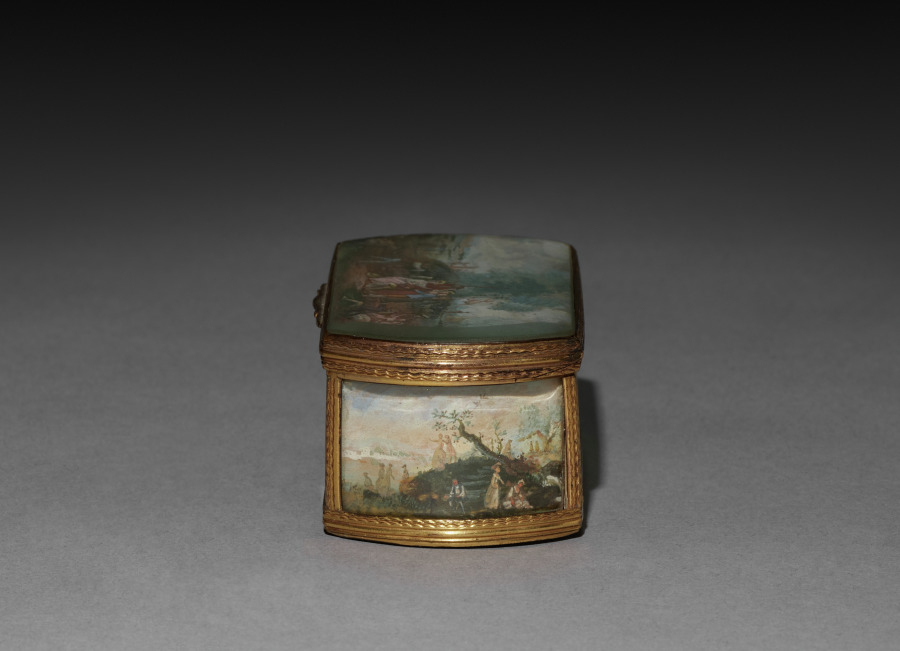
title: Snuff Box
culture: France, 19th century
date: 1800s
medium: gilt metal box with painted miniatures under glass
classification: Miscellaneous